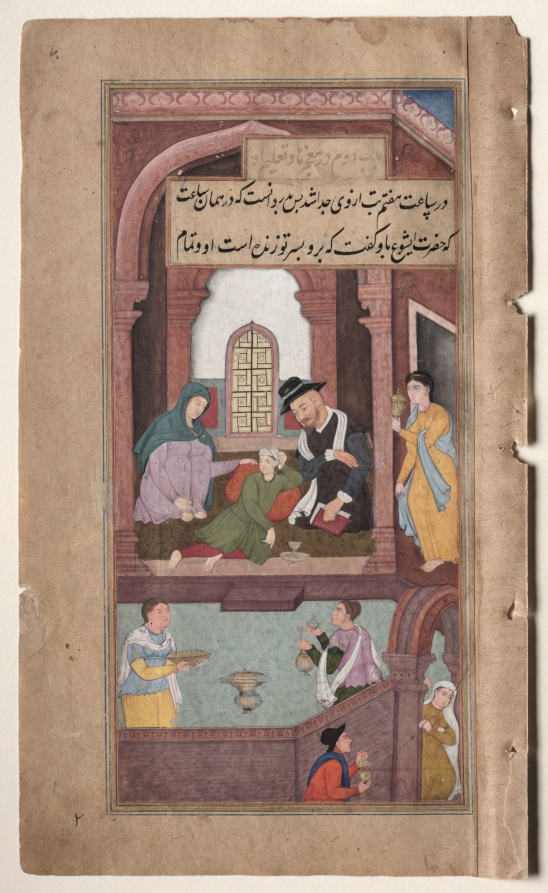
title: Jesus Heals the Nobleman’s Son in Capernaum (folio 70 recto), from a Mirror of Holiness (Mir’at al-quds) of Father Jerome Xavier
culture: Mughal India, Allahabad, made for Prince Salim (1569–1627)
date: 1602–4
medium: Gum tempera, ink, color, and gold on paper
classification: Manuscript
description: The diminutive figure wearing green in the center of the composition is the young son of a nobleman who was dying. Jesus healed him from afar so quickly that the subsidiary figures at the periphery of the scene are still anxious and bringing pots of remedies. This painting is unfinished; the border of the carpet and the geometric tile patterns on the floor of the forecourt have not been painted. An unknown number of artists with different backgrounds, skills, and experience contributed to this project, and even this work appears to be by at least two different hands.